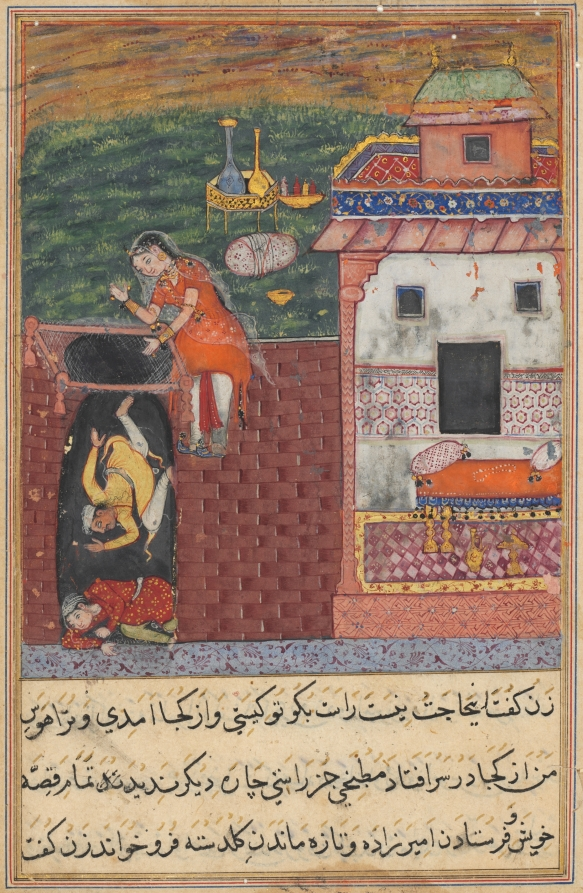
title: The two cooks, who attempt to seduce the warrior’s loyal wife, are trapped by her in a cellar, from a Tuti-nama (Tales of a Parrot): Fourth Night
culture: Mughal India, court of Akbar (reigned 1556–1605)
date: c. 1560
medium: gum tempera, ink, and gold on paper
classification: Painting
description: This story is about how wives who wish to be faithful will remain so, despite any seduction. This woman’s husband was a soldier, and when he was away on duty for months at a time, his master, the king, was intrigued at his wife’s faithfulness, proven by a magical rose garland that remained eternally fresh. The king wished to test her by sending his two handsome cooks to visit her and attempt to lure her into adultery. She tricked them into coming to her home and getting on a bed made of weak strings, positioned over a pit into which they fell. She kept them prisoner there until the king and her husband came to see what happened.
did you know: The cellar is represented in cross-section to reveal the scene inside.